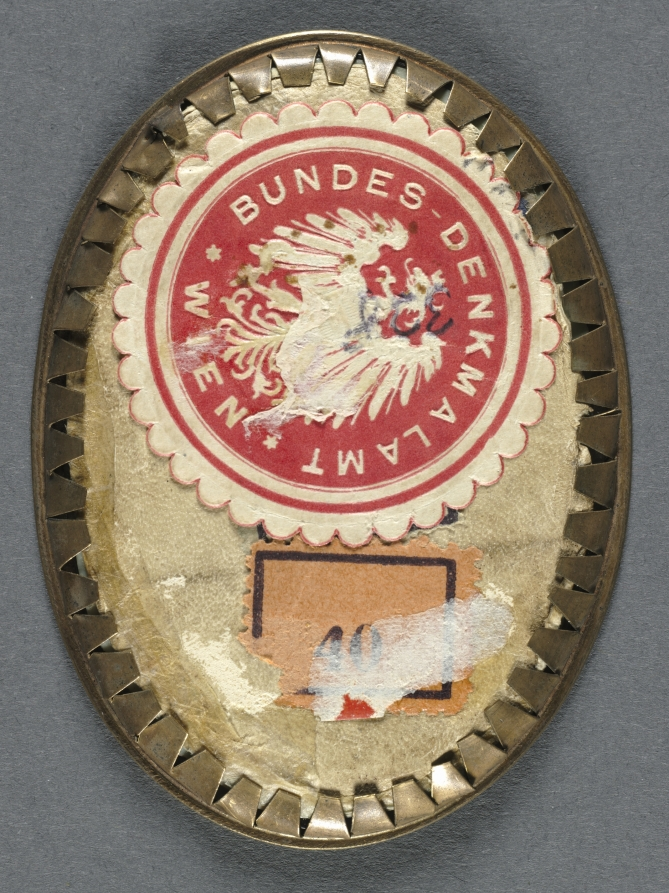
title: Woman with a Dog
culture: Italy, 18th century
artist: Rosalba Carriera (Italian, 1675–1757)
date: 1710–1720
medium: watercolor on ivory in a gilt metal mount with a saw-tooth enclosure at the back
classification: Portrait Miniature